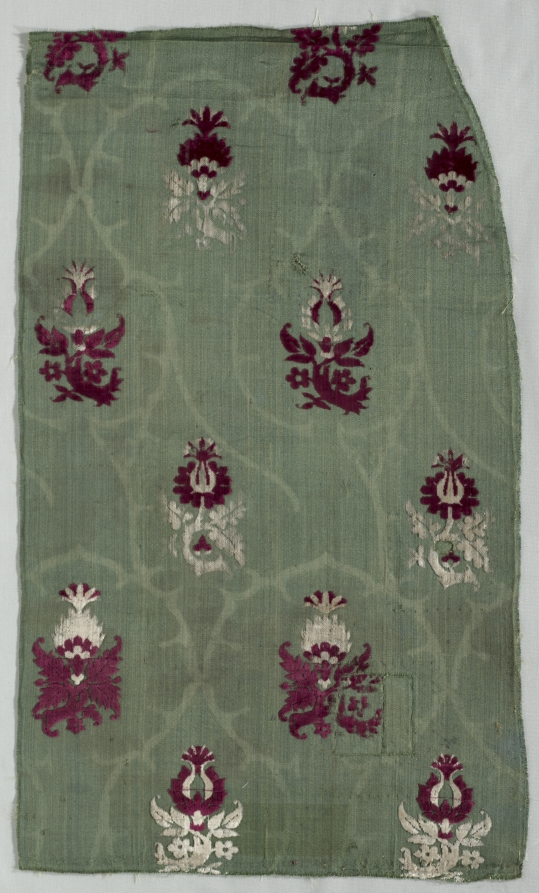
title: Velvet Fragment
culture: Italy, early 15th century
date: early 1400s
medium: velvet (cut and voided); silk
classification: Velvet